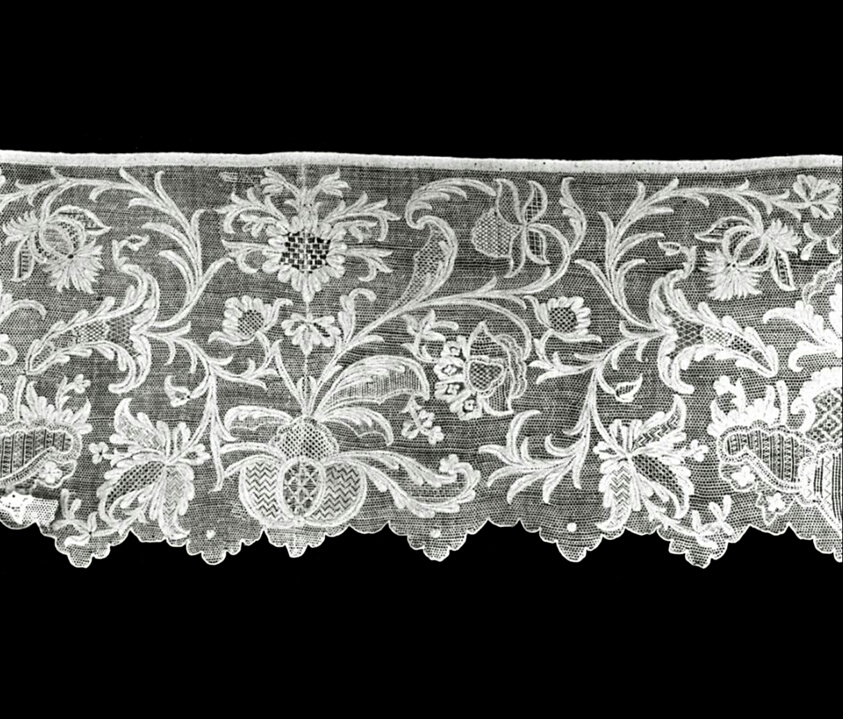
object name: Textile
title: Flounce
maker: Germany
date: 19th century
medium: Linen, plain weave; embroidered with linen yarns; pulled threadwork, embroidered in buttonhole, cross, crossed back, four-sided, herringbone, interlocking lace, overcast, punch, satin, single faggot, and wave filling stitches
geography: Germany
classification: textile; needlework (visual works); lace - needle